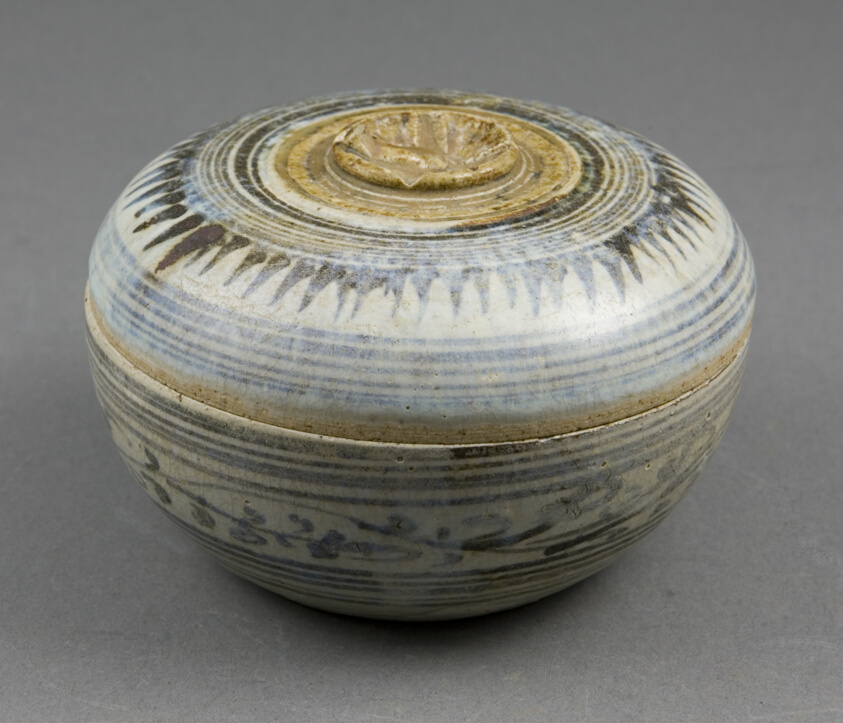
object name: Vessel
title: Sawankhalok Ware Covered Box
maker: Thailand, Sukhothai Province, Si Satchanalai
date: 14th/15th century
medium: Glazed stoneware with iron-brown and blue-grey underglaze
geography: Sawankhalok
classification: ceramics; asian art; vessel